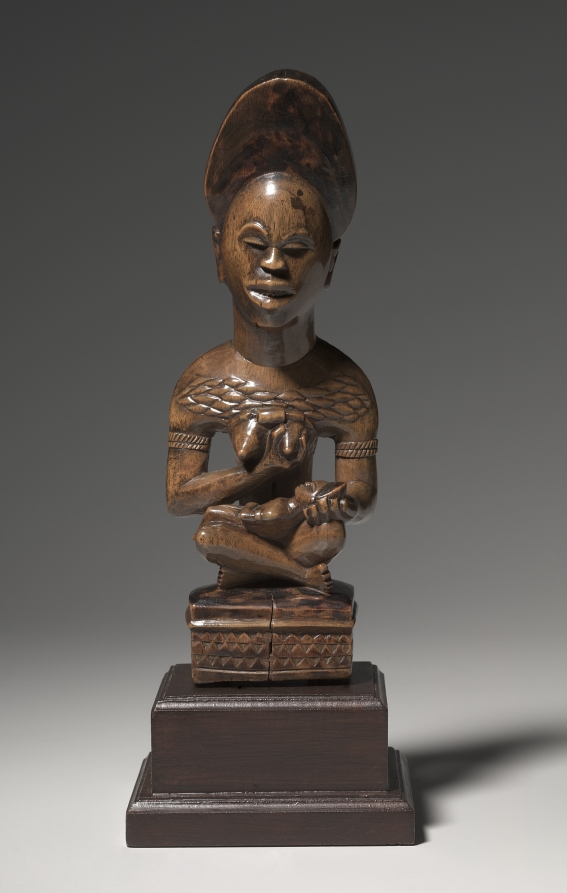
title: Woman and Child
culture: Africa, Central Africa, Democratic Republic of Congo, Yombe-style carver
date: mid- to late 1800s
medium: Wood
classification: Sculpture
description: This mother-and-child figure was probably part of a cult concerned with the treatment of infertility. Both her jewelry and her seated pose indicate that the woman occupied a high rank in her community. Her miter-shaped hairstyle, chiseled teeth, and raised body scars--considered to be marks of beauty and perfection--signal that the woman incarnates the founding ancestor of a kinship group.